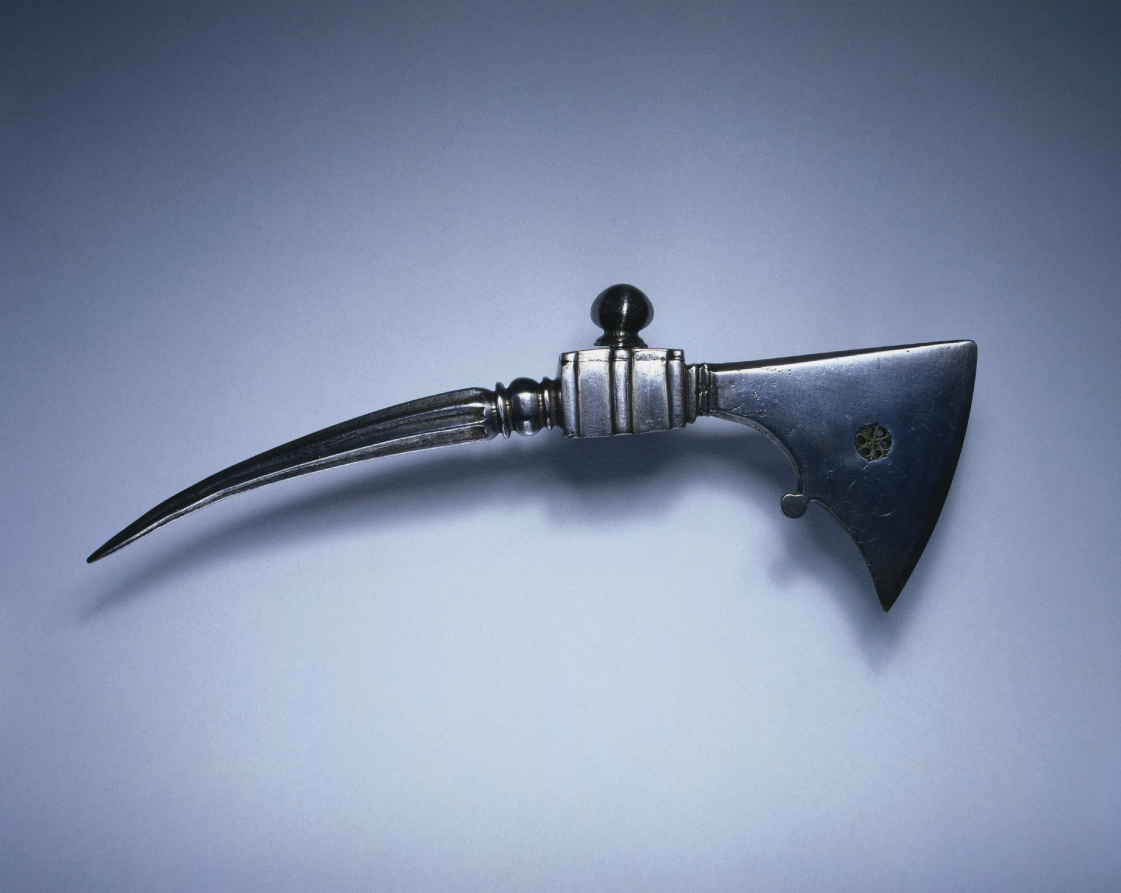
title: Battle Axe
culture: Italy, late 16th Century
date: late 1500s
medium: steel, inset with copper rosette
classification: Arms and Armor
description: The axe has been a favorite weapon in Europe for as long as armor has been worn. Although it was useful as a simple tool for chopping, battle axes could become a way of expressing personal style. They could be decorated and embellished without impeding their function. Inset into this axe head is a copper rosette.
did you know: The haft or wooden handle of this axe is missing.